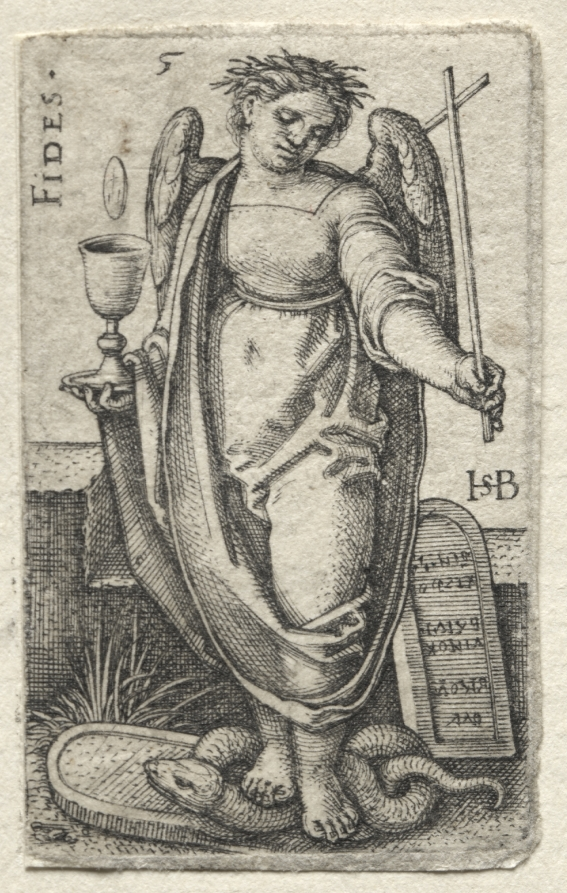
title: The Knowledge of God and the Seven Cardinal Virtues: Fidelity - Fides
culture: Germany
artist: Hans Sebald Beham (German, 1500–1550)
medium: engraving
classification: Print